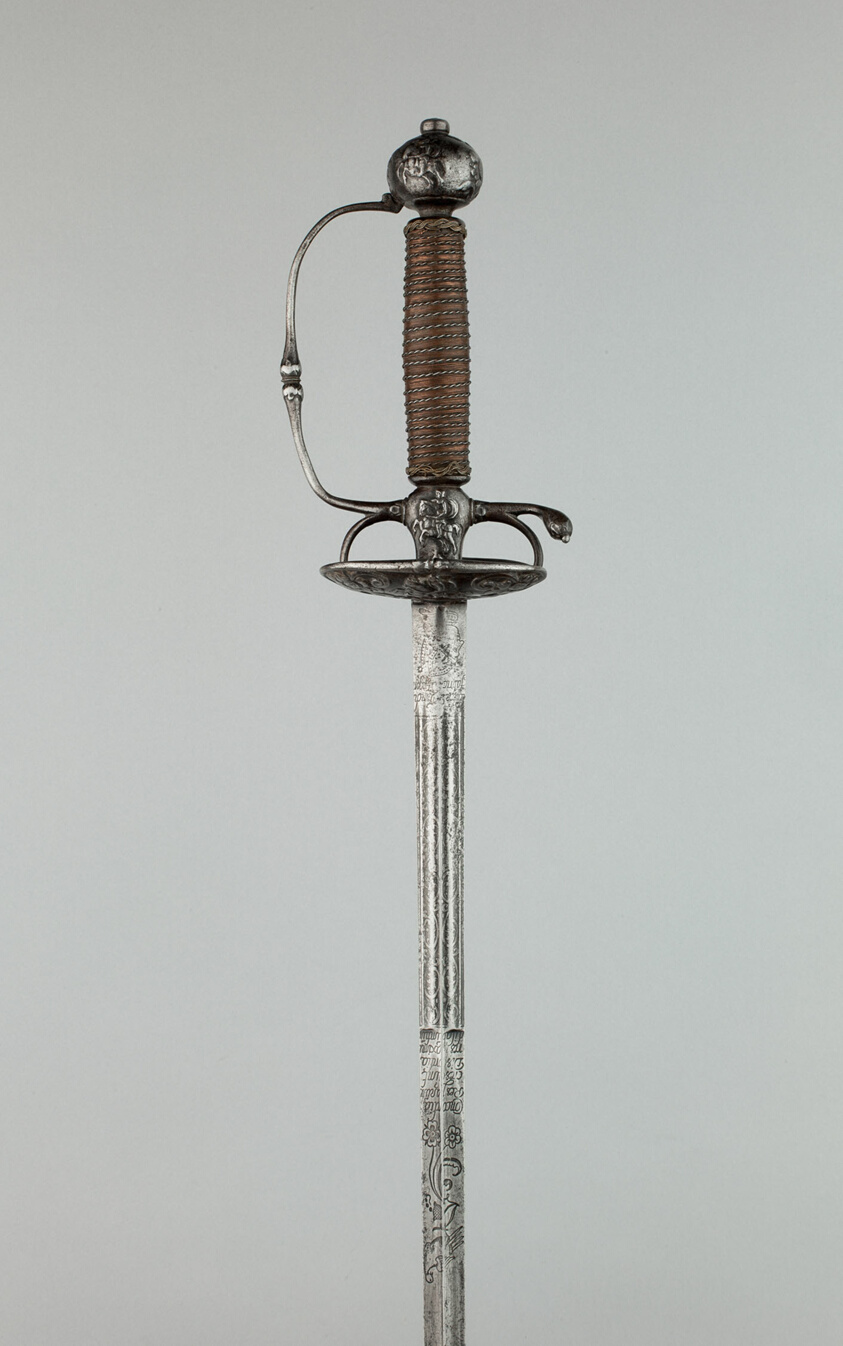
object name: Arms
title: Smallsword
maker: Blade: Peter Munch; Germany, Solingen, c. 1595-1660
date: c. 1650/60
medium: Steel and copper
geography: Germany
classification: edged weapon-sword; arms; arms and armor